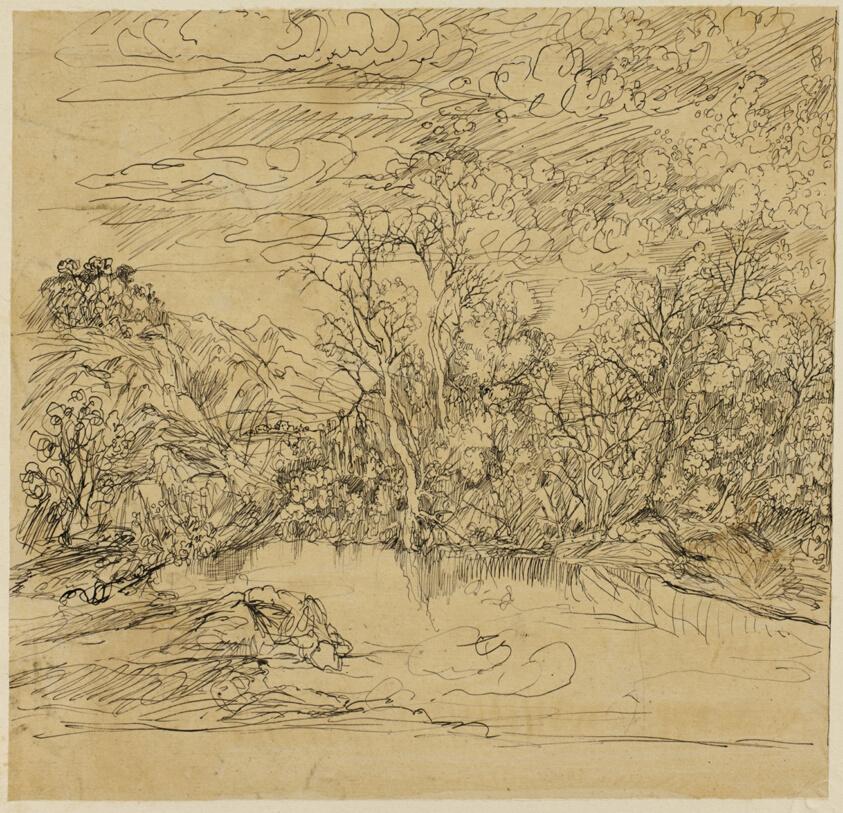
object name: Drawing and Watercolor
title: Bank of a Pond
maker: Rodolphe Bresdin (French, 1825-1885)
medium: Pen and black ink, on tan tracing paper, laid down on buff wove paper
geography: France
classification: pen and ink drawings; drawings (visual works); prints and drawing